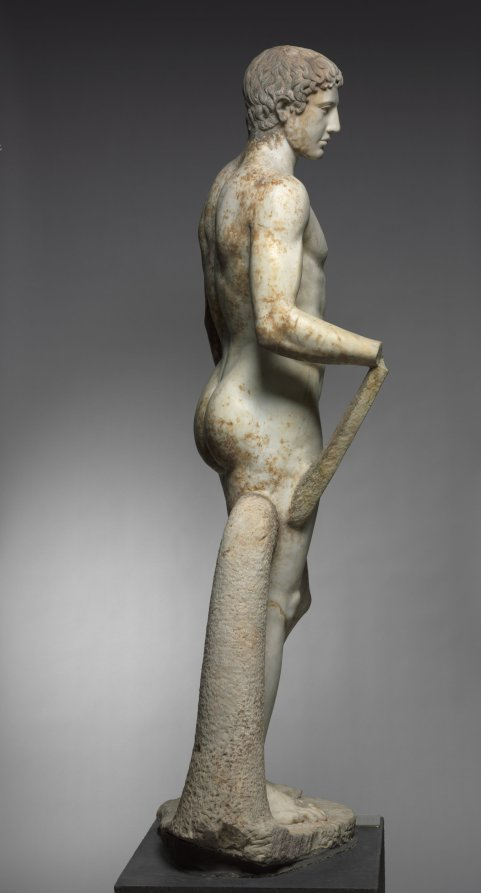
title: Statue of an Athlete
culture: Italy, Roman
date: 1–100 CE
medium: marble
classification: Sculpture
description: This idealized athlete recalls Greek sculptural types invented and popularized during the 400s BC. Large-scale athletes and other sculptures like this were originally created by famous artists as sanctuary dedications. Centuries later, they were widely copied and adapted by Roman sculptors, whose clients sought their own versions of earlier masterpieces. Working in marble rather than bronze, these sculptors added certain elements for stability, such as the struts and the large tree trunk beside the right leg here. Sculptures like this one are profoundly complex, made by and for Romans but descended from Greek ancestors.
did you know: For many years, this sculpture stood in the rotunda of the Cleveland Museum of Art.